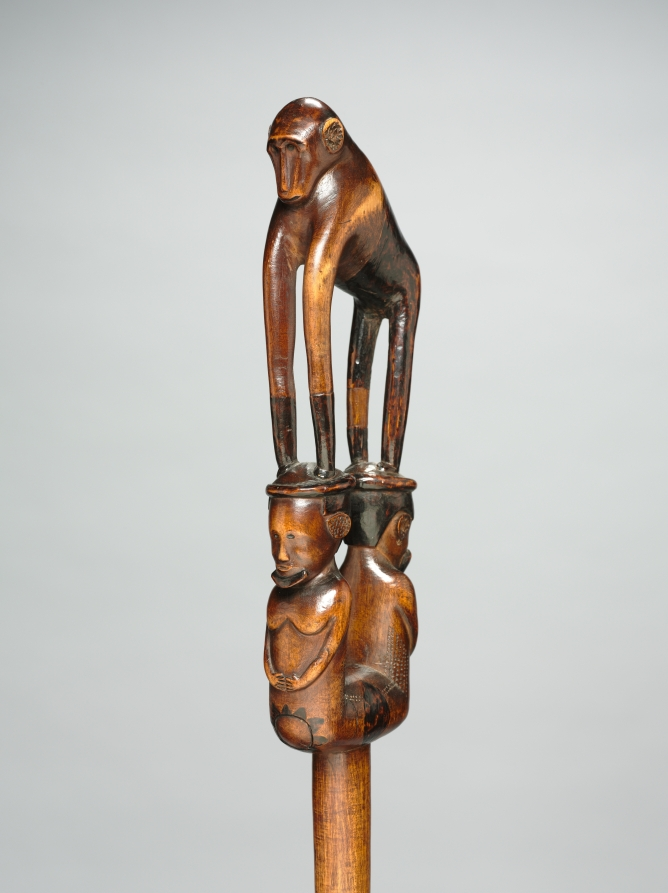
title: Staff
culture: Africa, South Africa, South Africa or Mozambique, probably Tsonga peoples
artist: The Baboon Master (probably Tsonga peoples)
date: 1800s–1900s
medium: Wood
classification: Sculpture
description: Arguably the finest surviving carving of the Baboon Master in a Western collection, this staff features exceptionally sophisticated articulation and detailing. The circular pokerwork motif on one side—which echoes the treatment of the ears on the male heads supporting the baboon—may represent a shield or a leaf. The heads feature the characteristic ornament that signifies maturity and marriage; covered with a mixture of gum, charcoal, and oil, this hairdo, called isicoco, employed a fiber or sinew ring into which the wearer’s hair was woven.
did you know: Artists working on the African continent often moved from place to place; the artist nicknamed The Baboon Master was of the Tsonga culture and worked in the Zulu kingdom.